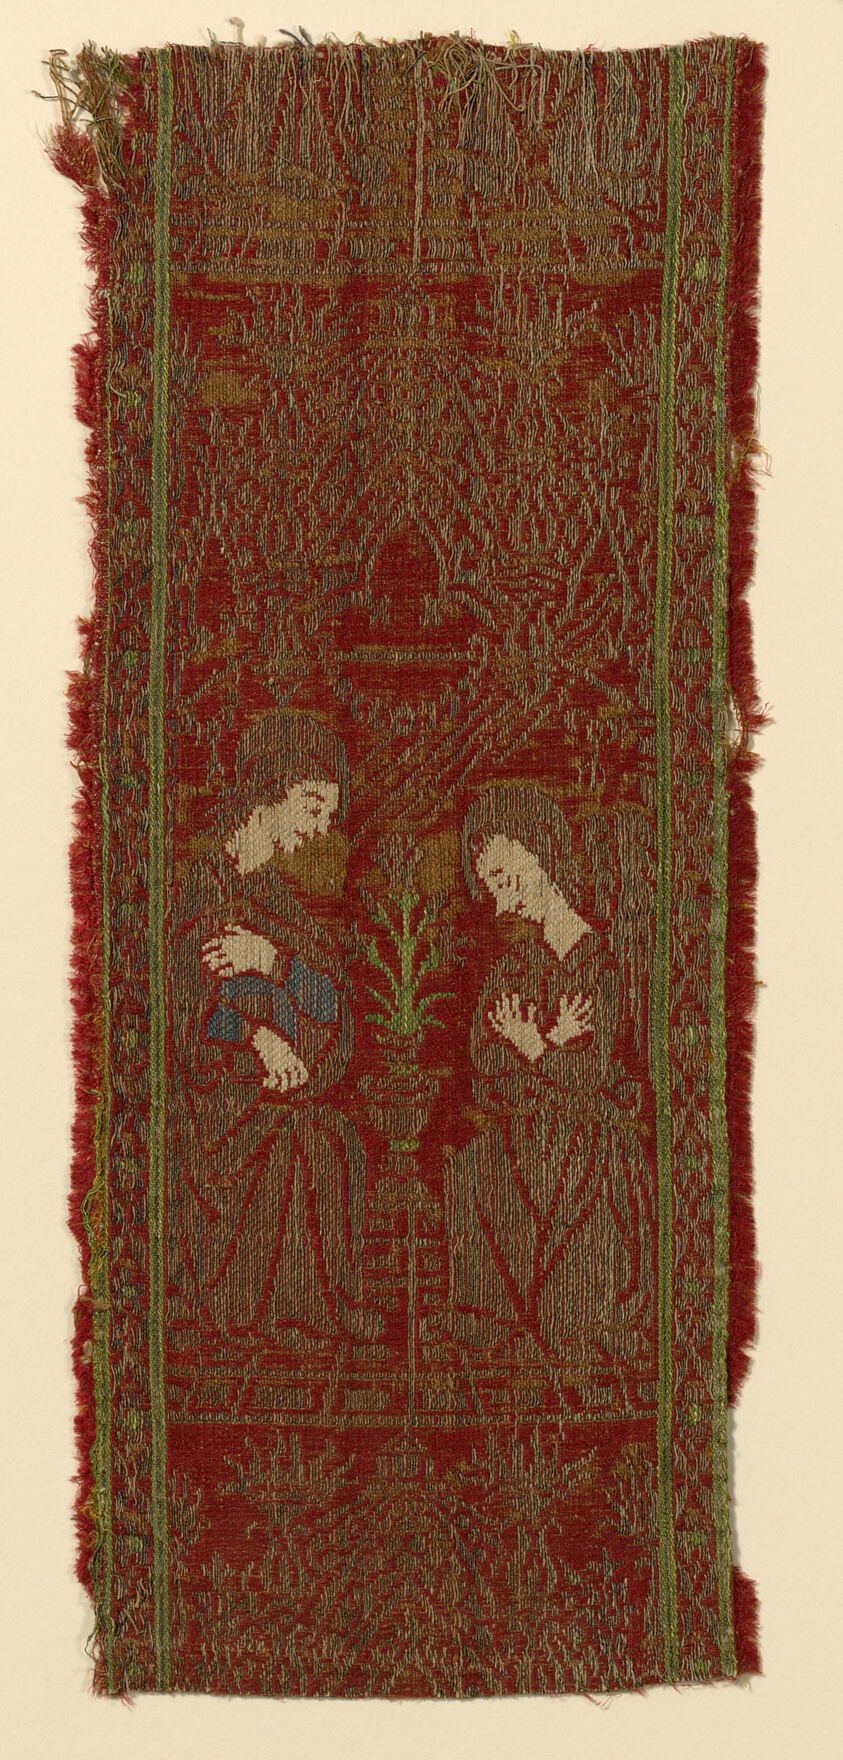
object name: Religious/Ritual Object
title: Fragment (From an Orphrey Band)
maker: Italy, Florence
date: Mid–15th century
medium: Silk and gilt-animal-substrate-wrapped linen, warp-float faced 4:1 satin weave with weft-float faced 1:2 'S' twill interlacings of secondary binding warps and supplementary patterning wefts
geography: Italy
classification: textile; weaving; liturgical; ritual objects